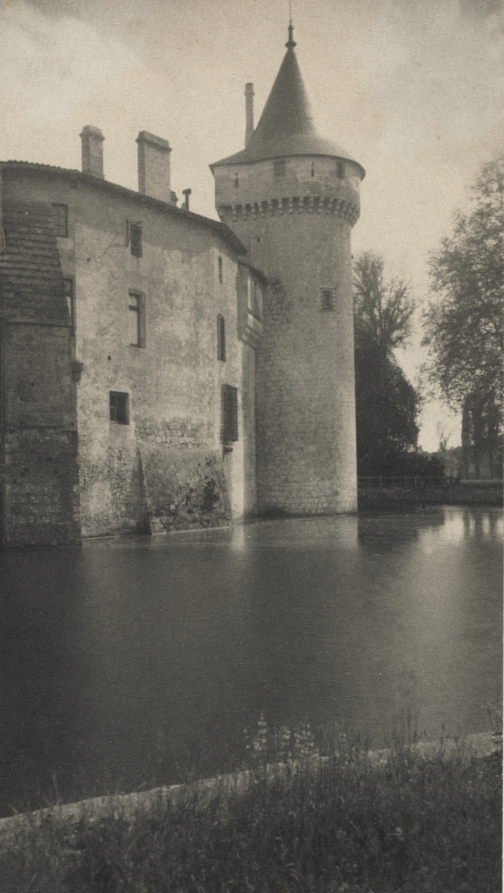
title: Chateau Montesquieu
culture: England, early 20th Century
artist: Frederick H. Evans (British, 1853–1943)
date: c. 1900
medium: platinum print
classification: Photograph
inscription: Written in pencil on recto of mount: "Chateau Montesquieu FHE"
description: Frederick H. Evans is recognized as the foremost architectural photographer of his day. A vocal defender of "straight" or unmanipulated photography, Evans was obsessed with technical and aesthetic perfection and never touched up his negatives or prints. His use of the platinum print process enabled him to render fine, accurate detail and an exquisite range of tones. Chateau Montesquieu depicts one of many great buildings the artist documented in France.